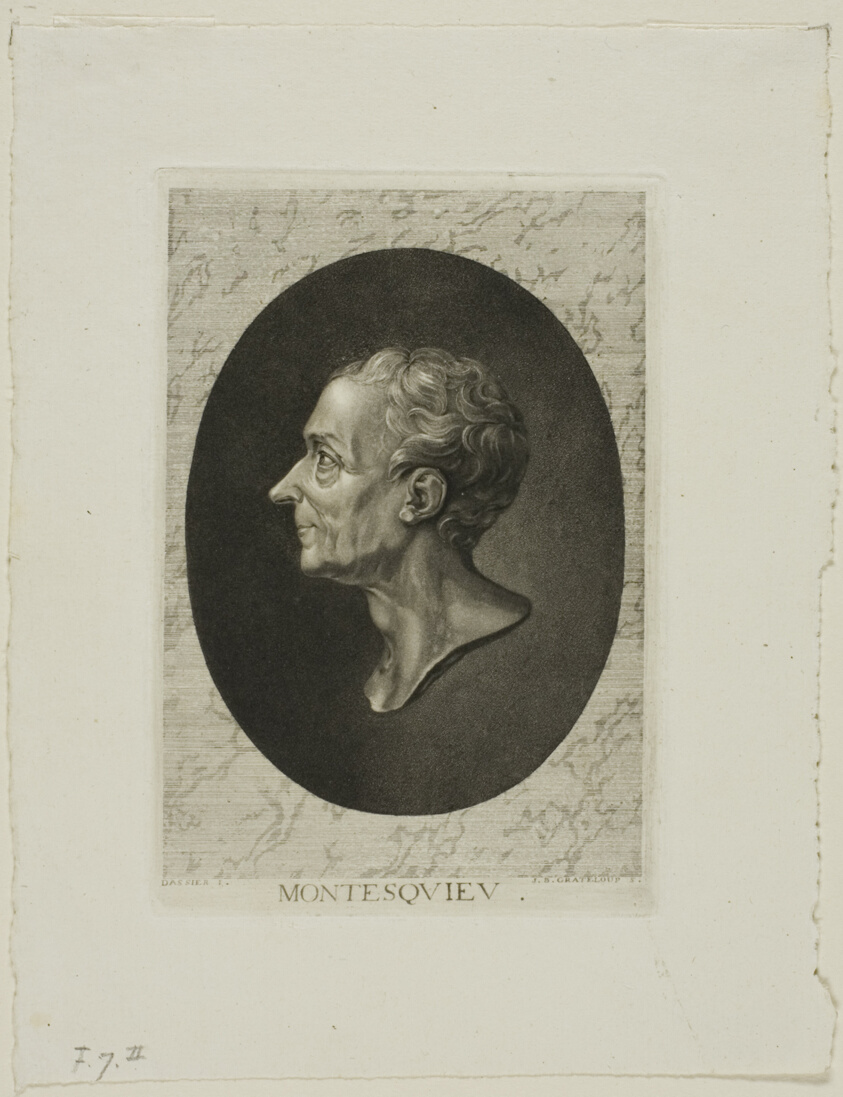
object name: Print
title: Montesquieu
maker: Jean-Baptiste de Grateloup (French, 1735-1817)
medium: Aquatint on paper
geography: France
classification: aquatint; print; prints and drawing